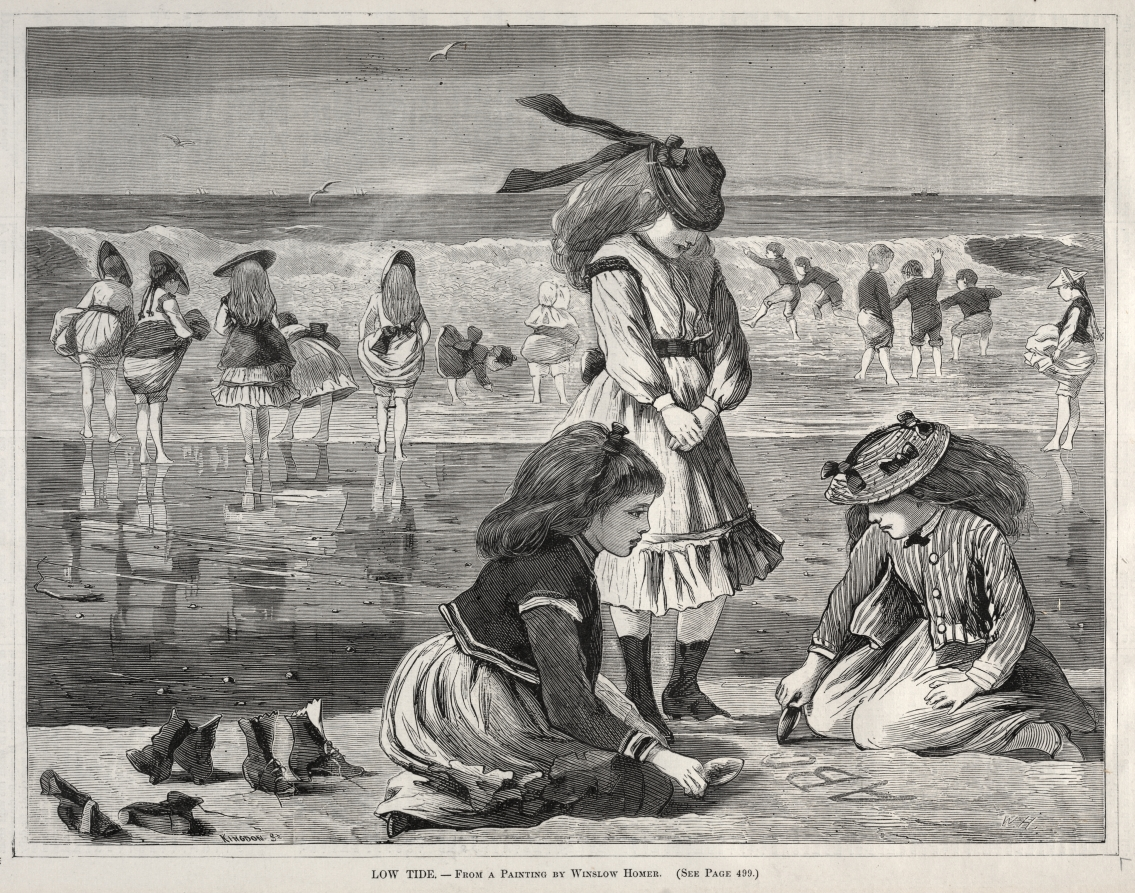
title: Low Tide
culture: America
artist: Winslow Homer (American, 1836–1910)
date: 1870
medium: wood engraving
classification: Print